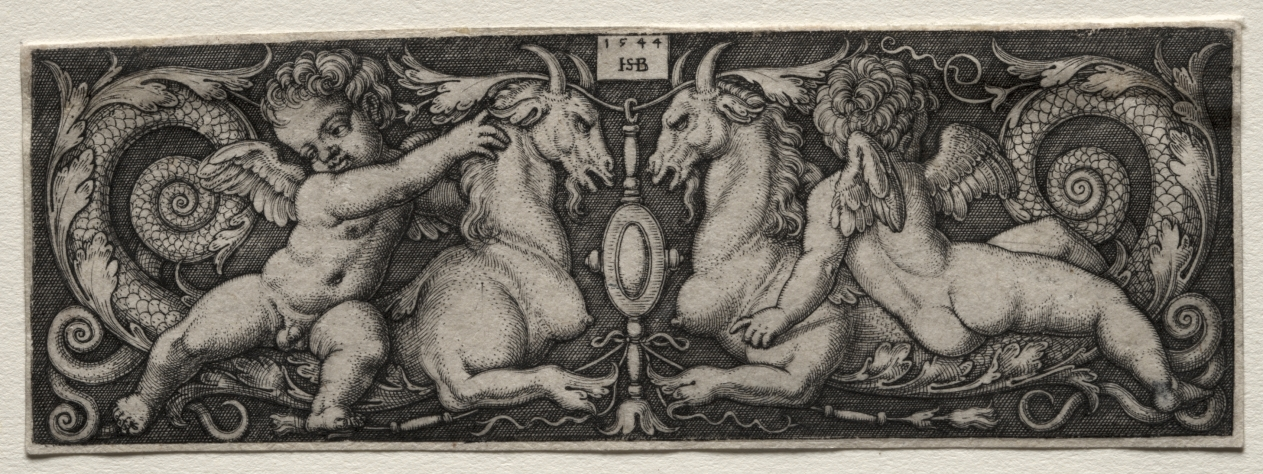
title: Two Genii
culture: Germany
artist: Hans Sebald Beham (German, 1500–1550)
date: 1544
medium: engraving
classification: Print